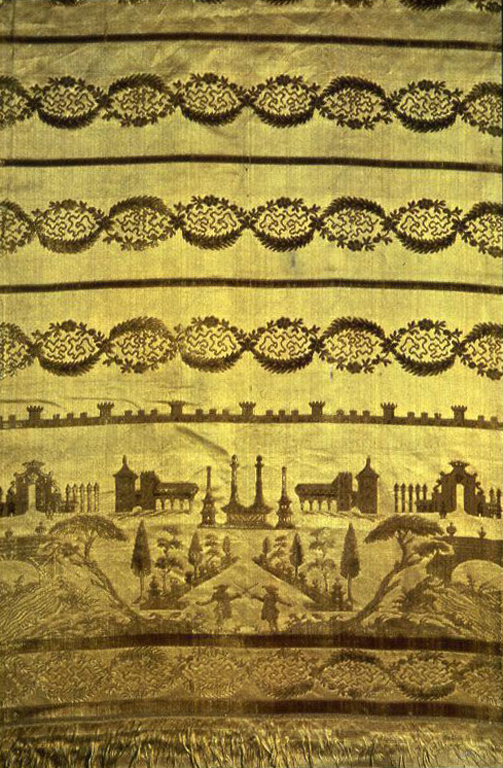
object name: Textile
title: Panel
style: chinoiserie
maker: Spain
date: 1775/1800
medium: Silk, satin weave with patterning wefts, cut and uncut voided velvet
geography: Spain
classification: textile; weaving - velvet; weaving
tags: botanical/floral, cityscapes, people